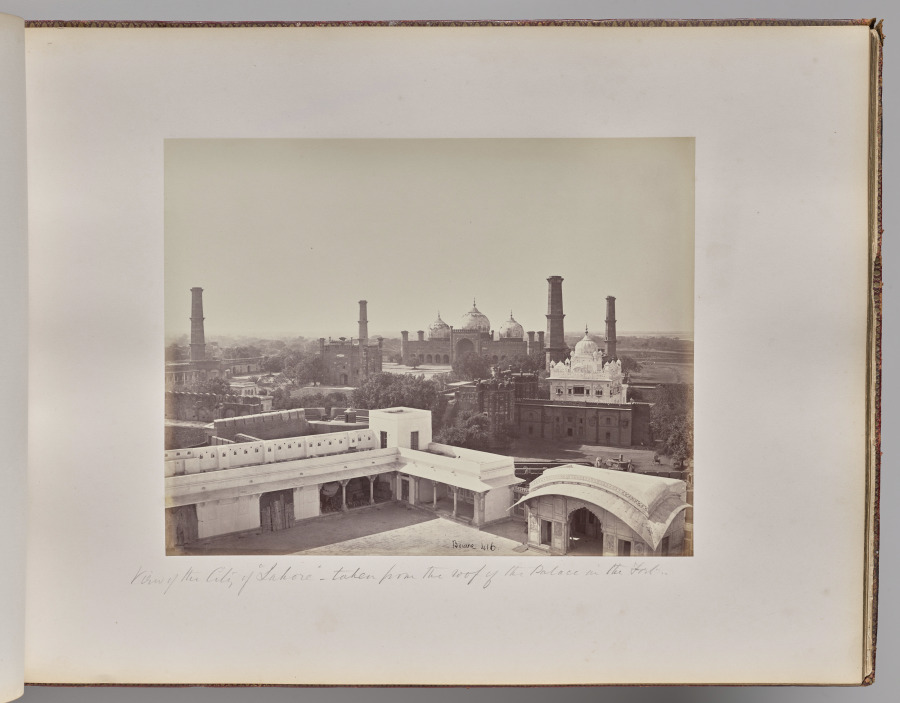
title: View of the City of Lahore Taken from the Roof of the Palace in the Fort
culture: England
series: Photographs of Northern India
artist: Samuel Bourne (British, 1834–1912)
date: 1863–70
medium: albumen print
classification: Photograph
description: The 50 images in this album, all taken in the 1860s, move from the hill towns of the Himalayas down to cities including Lahore (now in Pakistan), Delhi, Lucknow, Agra, Benares (now Varansi), and Calcutta (now Kolkata). Architectural studies of major monuments offer valuable historical records of what sites such as the Taj Mahal and the imperial mosque of the Mughal emperors in Delhi looked like before twentieth-century restorations.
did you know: Samuel Bourne, the author of most the images in this album, was a banker in England before he moved to India to become a professional photographer.